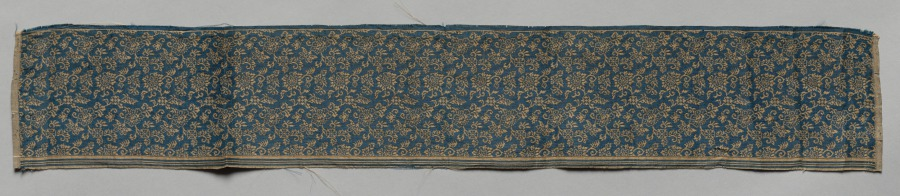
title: Textile Fragment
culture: Japan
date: 1800s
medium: silk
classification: Textile